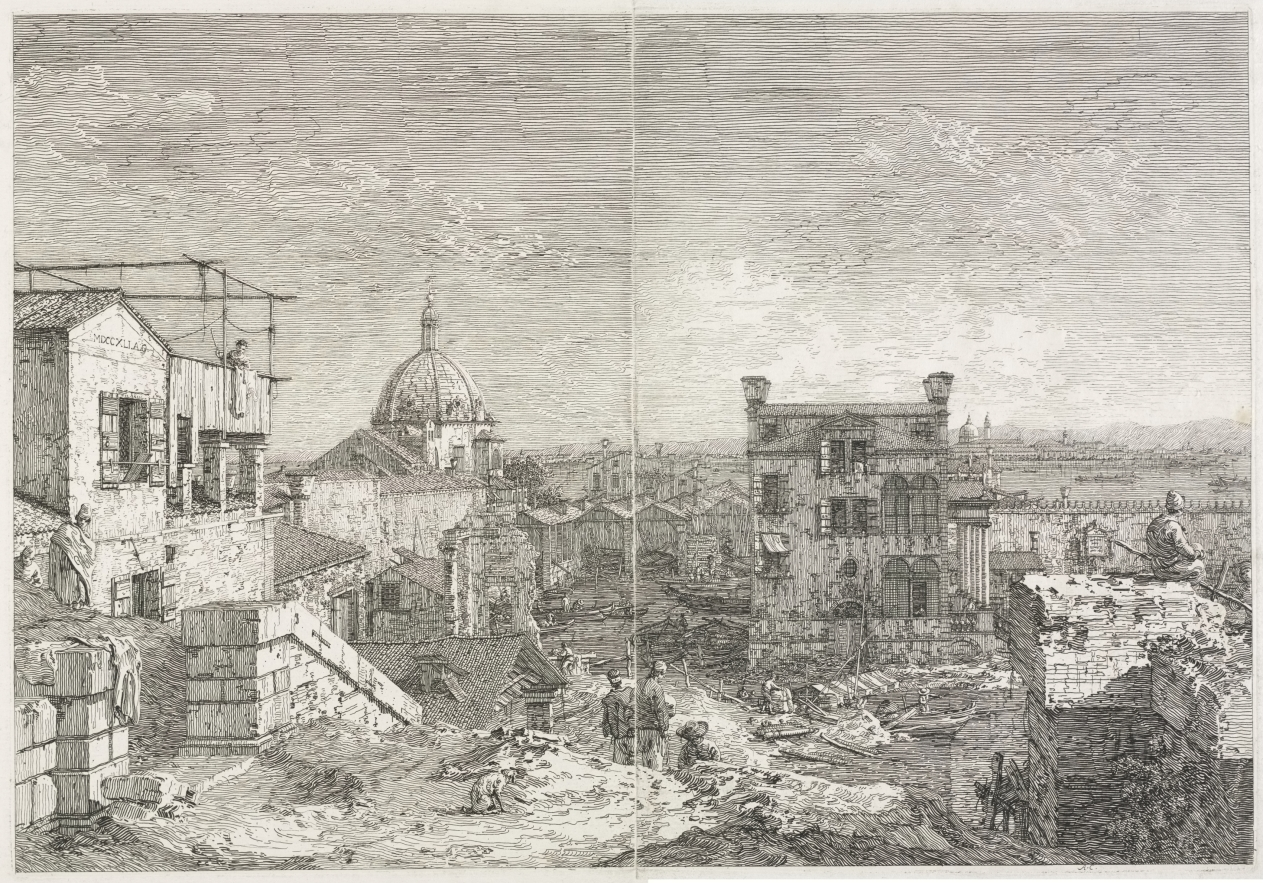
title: Views: La Maison a l'inscription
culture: Italy, Venice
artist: Antonio Canaletto (Italian, 1697–1768)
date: 1735–1746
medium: etching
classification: Print